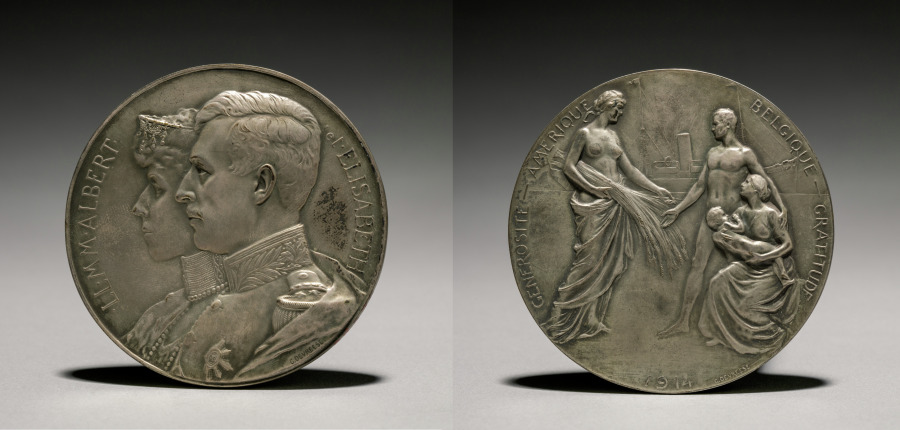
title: Medal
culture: Belgium, early 20th century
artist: Godefroid Devreese (Belgian, 1861–1941)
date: 1914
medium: bronze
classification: Metalwork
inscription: obverse - "LL.MM.ALBERT et ELISABETH"; signed: "G. Debreese." reverse - "Generosite -- Amerique. Belgique -- Gratitude"; signed: "1914 G. Devreese."